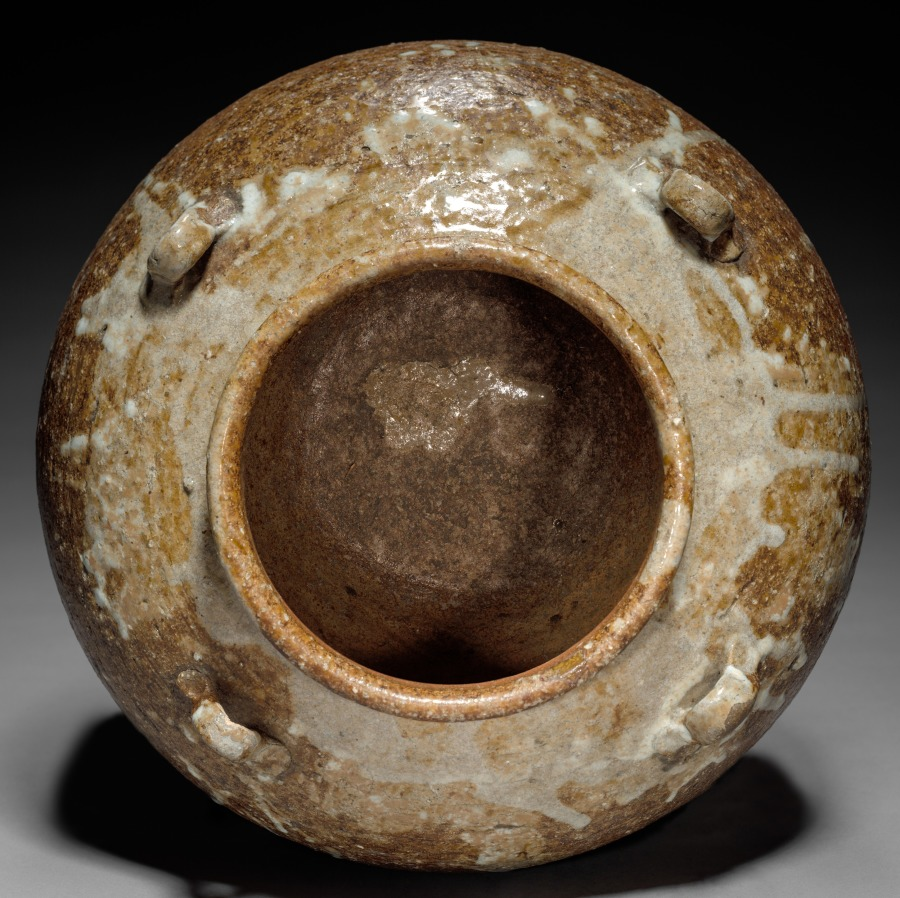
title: Tea Storage Jar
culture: Japan, Edo period (1615–1868)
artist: Nonomura Ninsei (Japanese, active 1640s–90s)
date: mid- to late 1600s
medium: Stoneware with white glaze (Shigaraki style)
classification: Ceramic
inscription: Ninsei seal impressed in the clay on bottom.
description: In this tea storage jar, Nonomura Ninsei reinterpreted a Shigaraki stoneware—made to hold agricultural products and known for its warm orange color, asymmetrical round forms, and irregular natural ash glazes—to produce a more refined piece that would appeal to tea masters seeking a touch of rusticity. In Japanese tea culture, hanging scroll paintings or calligraphy are placed in the tokonoma, or viewing alcove, for participants to admire and discuss along with the utensils used in the gathering. The scrolls are typically paired with vessels containing seasonal floral arrangements.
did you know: This jar may be considered an example of the aesthetic known as kireisabi, or refined rusticity.